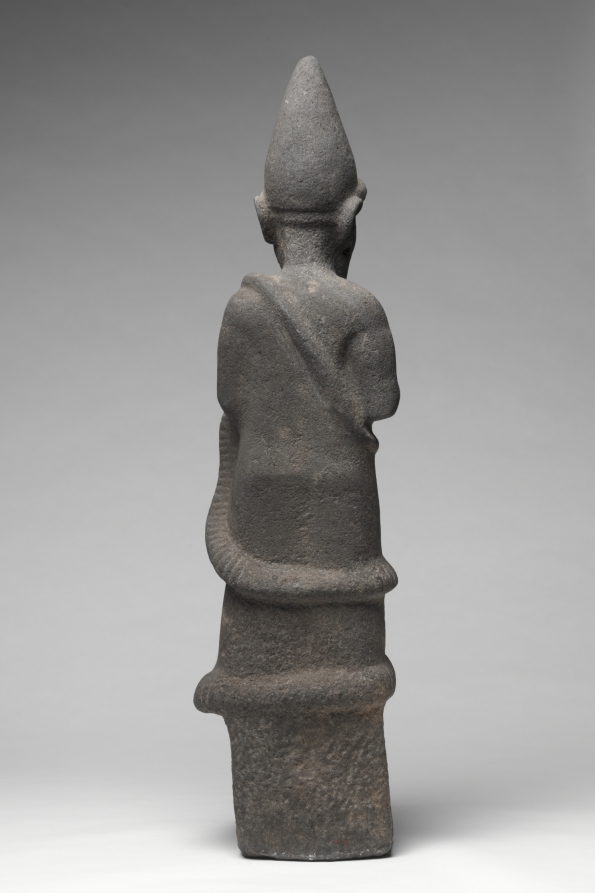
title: Priest-King or Deity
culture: Hittite, North Syria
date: c. 1600 BCE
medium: basalt with bone eyes (left, ancient; right, restored)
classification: Sculpture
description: The Hittites migrated into Anatolia in the 3rd millennium BCE and spoke an Indo-European language, a group that includes Greek, Latin, Persian, Sanskrit, English, and most modern European languages. They were the first ancient people to use iron for weapons. From about 1600–1200 BCE their empire was at its peak, extending from central Anatolia to Syria, and south along the eastern Mediterranean. Their vast empire and interest in commerce enabled the Hittites to spread Mesopotamian ideas and culture throughout the ancient Mediterranean world. This large basalt sculpture is exceptionally rare in depicting a Hittite god or priest-king wearing a horned conical crown, false beard, and long robe. He holds a bowl in his right hand and once held something in his left, perhaps a staff or sword.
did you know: The left eye of the sculpture is the original bone inlay while the right eye is a modern restoration done after the piece was damaged.